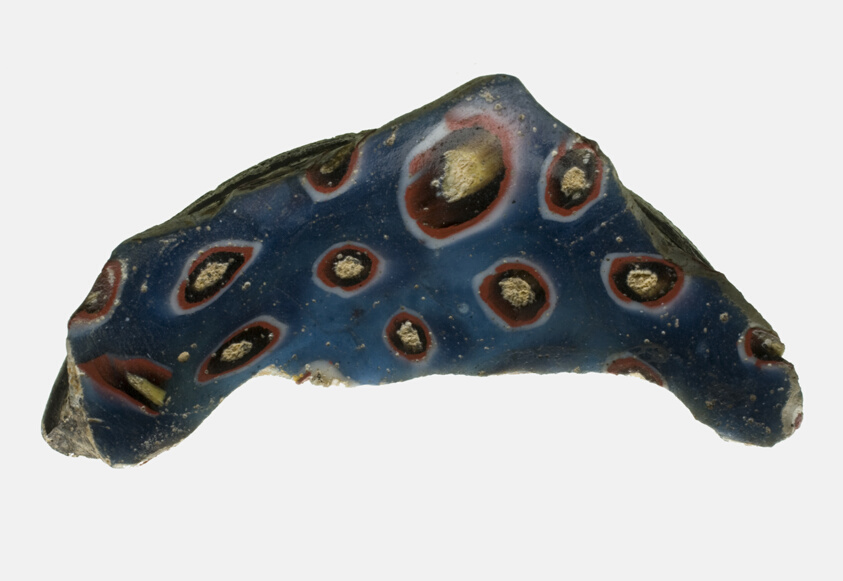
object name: Decorative Arts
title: Fragment of a Bowl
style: ancient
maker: Roman or Eastern Mediterranean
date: 1st century BCE–1st century CE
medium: Glass, mosaic technique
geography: Roman Empire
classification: fragment; decorative arts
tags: decoration